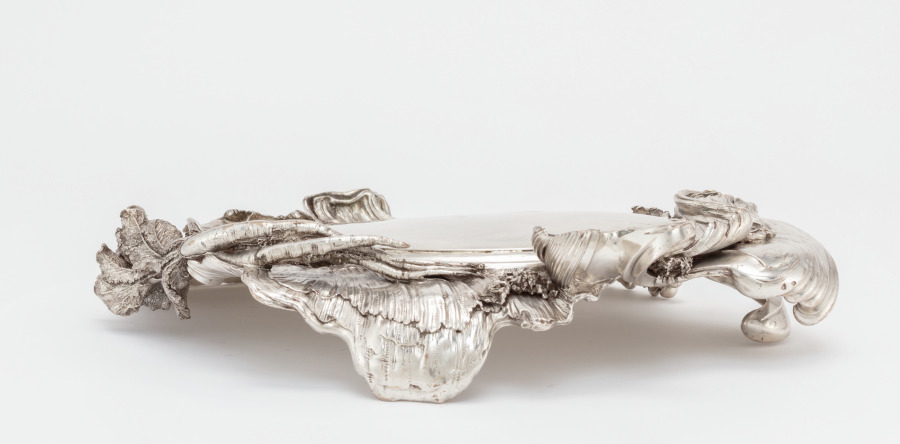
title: Stand for a Covered Tureen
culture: France, Paris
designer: Juste-Aurèle Meissonnier (French, 1695–1750)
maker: Pierre-François Bonnestrenne (French)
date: 1735–38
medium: silver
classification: Silver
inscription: engraved Meissonnier signature.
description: See entry for cover record 1977.182.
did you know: The langoustine, pigeon, and vegetables were cast using real examples giving the silver copies lifelike detail and appearance.